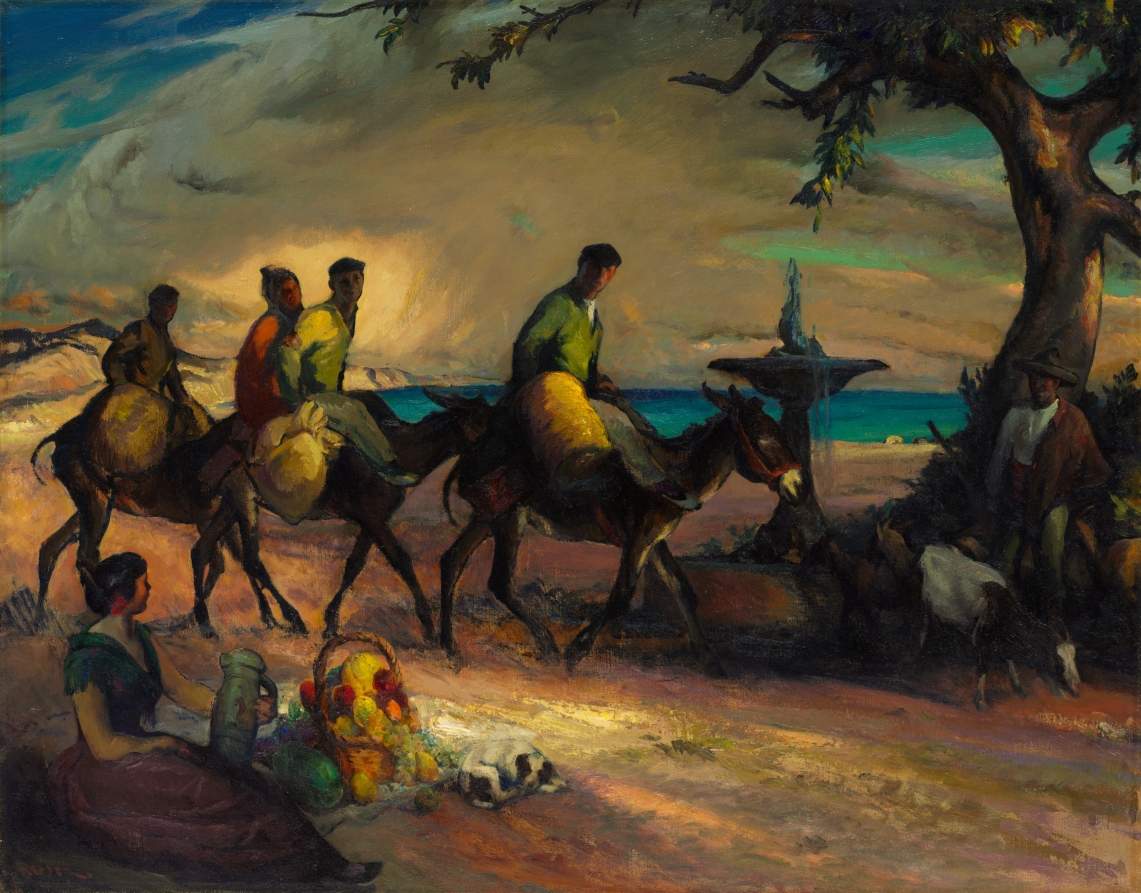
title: The Road to the Sea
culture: America, Ohio, Cleveland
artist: Henry Keller (American, born Germany, 1869–1949)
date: 1923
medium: oil on canvas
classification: Painting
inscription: signed lower left: Keller